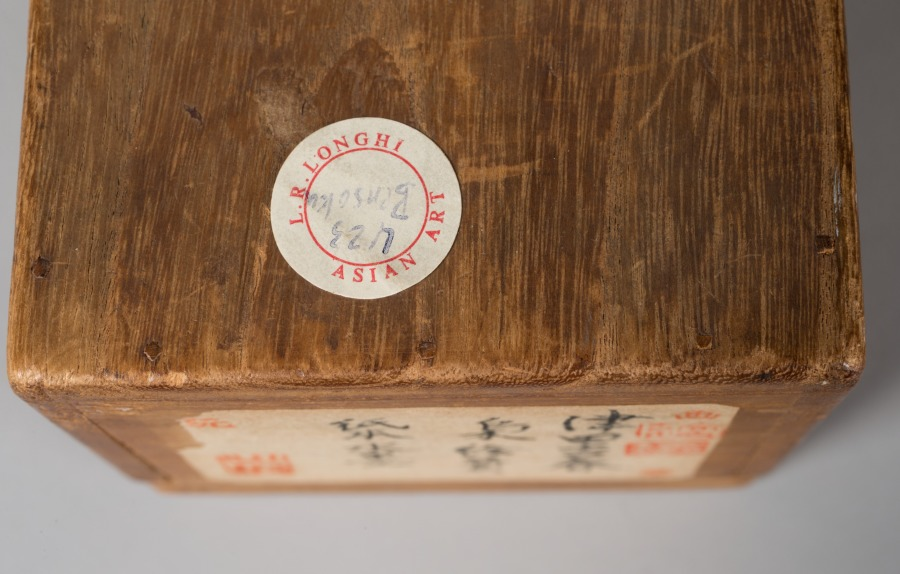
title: Owl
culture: Japan, Edo period (1615–1868)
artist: Tsuda Bensaku (Japanese, active 1620s–40s)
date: 1630s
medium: hanging scroll; ink and slight color on paper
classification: Painting